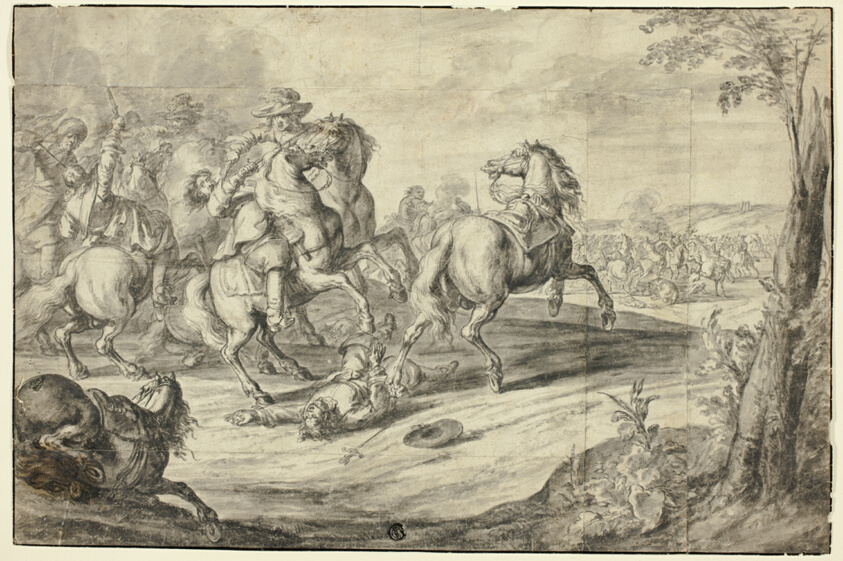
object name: Drawing and Watercolor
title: Soldiers in Battle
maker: Possibly Jan van Huchtenburgh; Dutch, 1647-1733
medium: Brush and gray wash, with touches of graphite, on cream laid paper, pieced together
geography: Flanders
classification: ink or chalk wash; drawings (visual works); prints and drawing